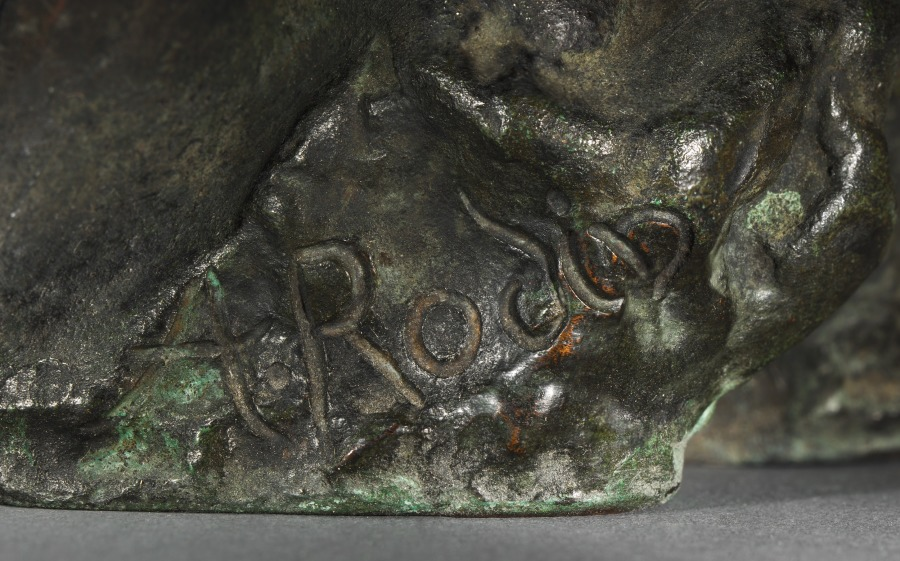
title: Les Damnées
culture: France, 19th century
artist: Auguste Rodin (French, 1840–1917)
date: 1885–1895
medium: bronze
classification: Sculpture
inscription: Signed front bottom right: "A. Rodin"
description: Rodin derived this couple, whose twisted bodies are locked painfully together, from the naked figures writhing in agony in his monumental sculpture The Gates of Hell.